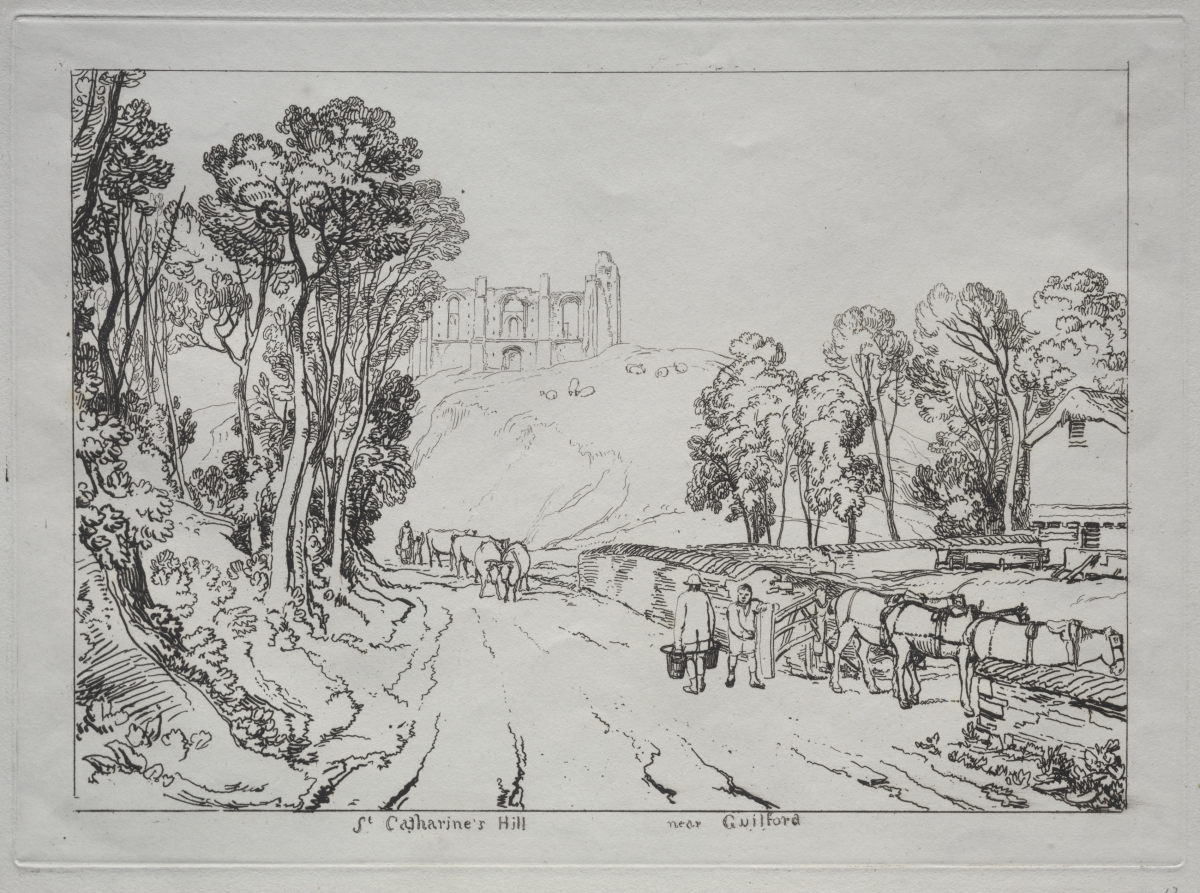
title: Liber Studiorum: St. Catherine's Hill, near Guilford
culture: England, 19th century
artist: Joseph Mallord William Turner (British, 1775–1851)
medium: etching and mezzotint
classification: Print